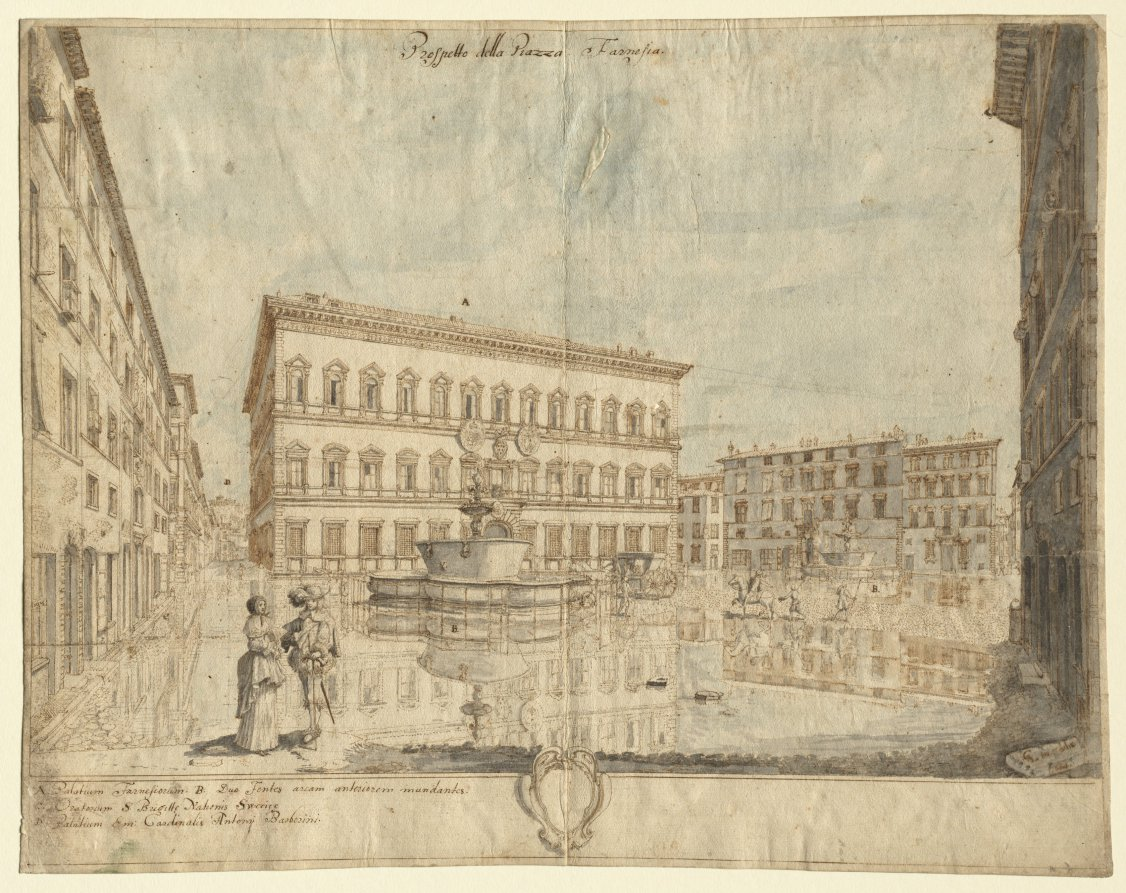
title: Eighteen Views of Rome: The Piazza Farnese (recto)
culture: Flanders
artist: Lievin Cruyl (Flemish, c. 1640-c. 1720)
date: 1664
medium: pen and brown ink and brush and gray and blue wash over graphite; squared in graphite (two figures in the foreground); framing lines in brown ink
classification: Drawing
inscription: signed, lower right, in brown ink: [artist's monogram: LC] inv. et delin. / 1664. ; by artist, upper center, in brown ink: Prospetto della Piazza Farnesia. ; by artist, througout composition, in brown ink: [the letters A-D] ; by artist, lower left, in brown ink: A. Palatium Farnesiorum. B. Duo Fontes aream anteriorem mundantes. / C. Oratorium S. Brigitte Nationis Sweciæ / D. Palatium Em: Cardinalis Antonij Barberini.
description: Flemish artist Lieven Cruyl made a number of drawings of emblematic vistas of Rome for the Roman publisher Giovanni Battista de Rossi, of which ten were published as etchings in 1666. The Piazza Farnese features architecture designed by Michelangelo, who completed the Palazzo Farnese after the death of its original designer, Antonio da Sangallo, in 1546. His main contribution was the third story and the significantly protruding cornice at the top of the facade, which dramatically hangs over the front of the building, like sculpture.